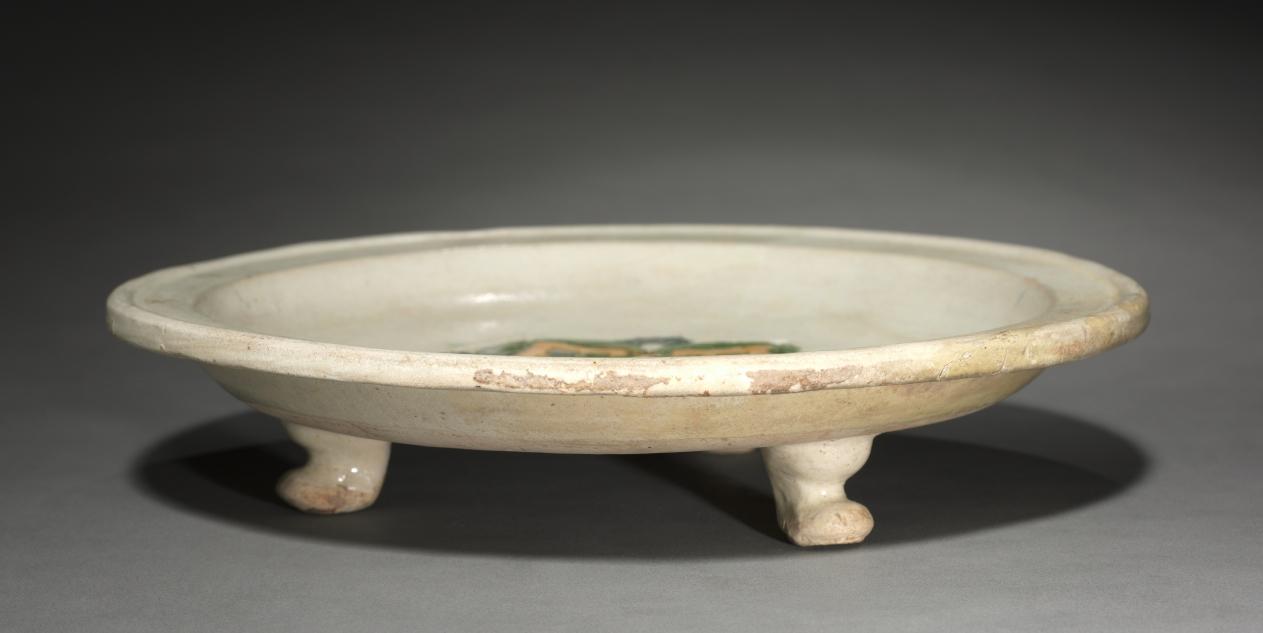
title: Footed Plate with Floral Medallion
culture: China, Tang dynasty (618-907)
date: early 700s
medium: glazed earthenware with impressed decoration, sancai (three-color) ware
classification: Ceramic